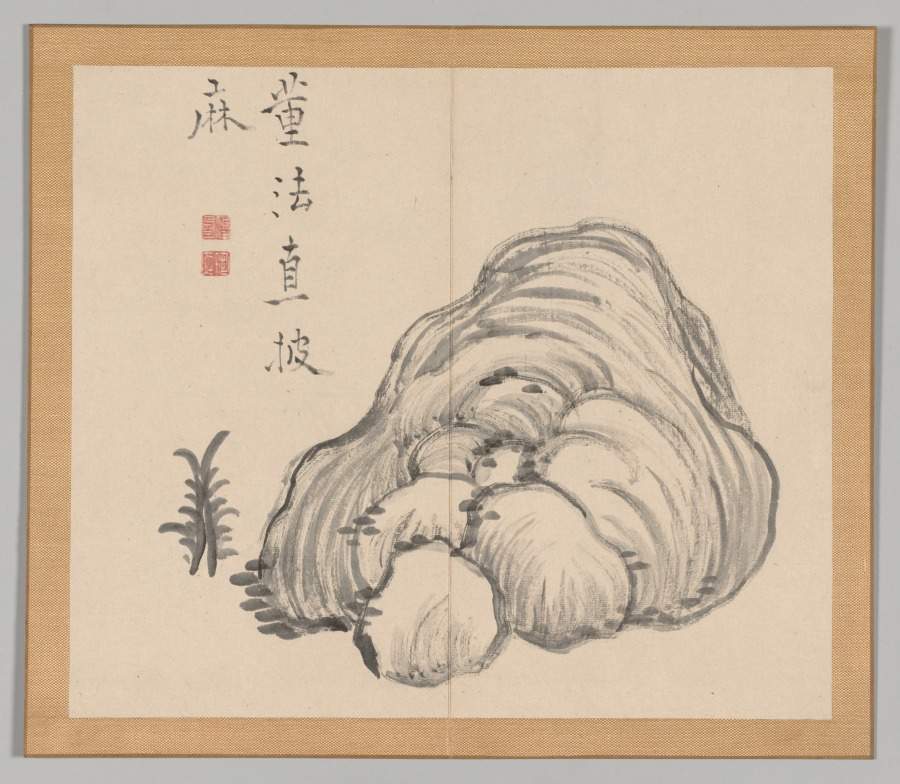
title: Reverberations of Taiga, Volume 1 (leaf 14)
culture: Japan, Edo period (1615–1868)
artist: Aoki Shukuya (Japanese, d. 1802)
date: mid- to late 1700s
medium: double-leaf from a pair of albums; ink and light color on paper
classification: Portfolio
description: Traditionally, young painters in Japan began their studies with an established master-painter. The master's compositions invariably became models that the apprentice copied to learn various ink and brush techniques. Shukuya was a pupil of the famous Kyoto artist Ikeno Taiga, whose style is reflected in these sketches of rocks, trees, and mountains.